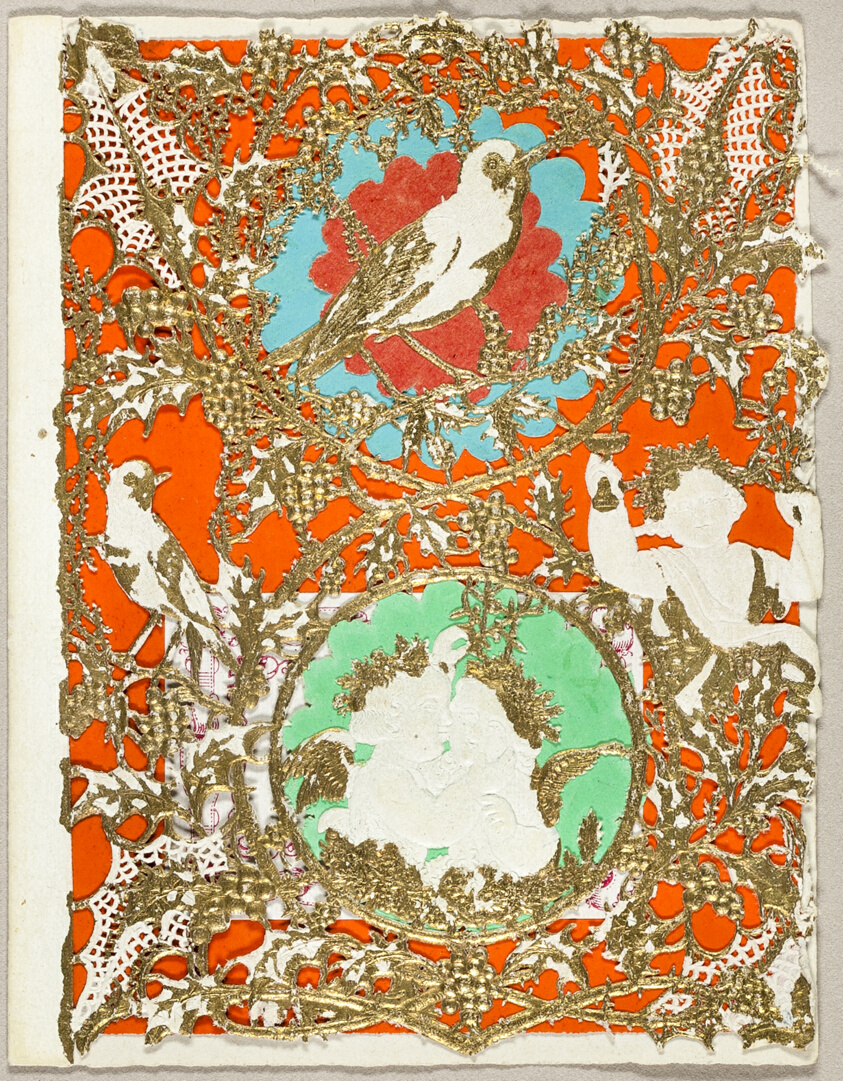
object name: Drawing and Watercolor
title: Untitled Valentine (Putti and Birds)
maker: Thomas Wood (English, 19th century)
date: 1860/69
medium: Gold paint and collaged elements on cut and embossed (designed) ivory wove paper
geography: England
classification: collage; valentine; prints and drawing; paper